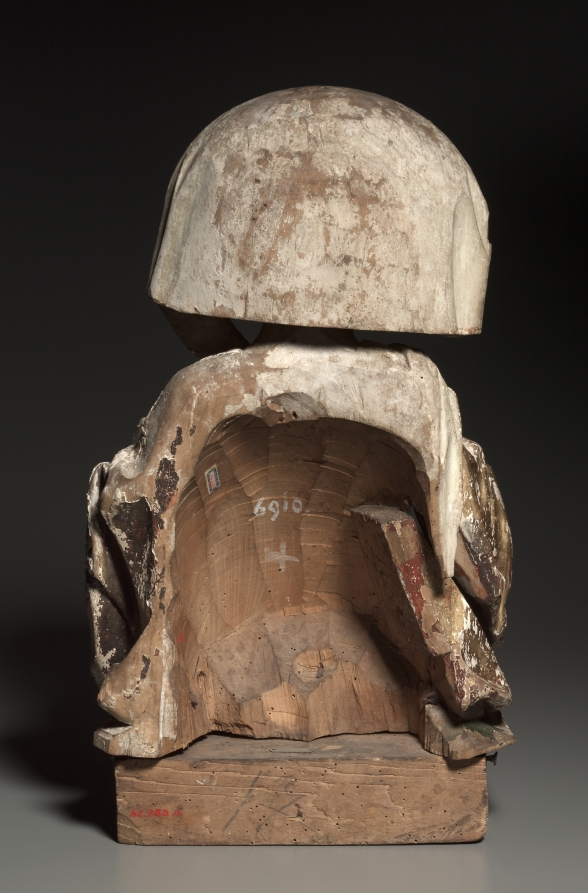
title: Female Bust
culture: Austria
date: c. 1470–1500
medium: Painted and gilded lindenwood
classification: Sculpture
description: This female bust is part of a series of three in the museum's collection. The identity of the figures has been speculated by scholars but without resolution. Because this and the other female busts in the series do not retain their attributes, it is difficult to know their original purpose. It is possible that they may have once formed a group of female saints from the predella of a large altarpiece. Since the sculpture is not carved in the round, this hypothesis has merit. Another recent proposal is that this and the other sculptures may be from a series of female busts representing the wise and foolish virgins referenced in Matthew 25:1-13, a parable by Jesus admonishing listeners to be spiritually prepared.